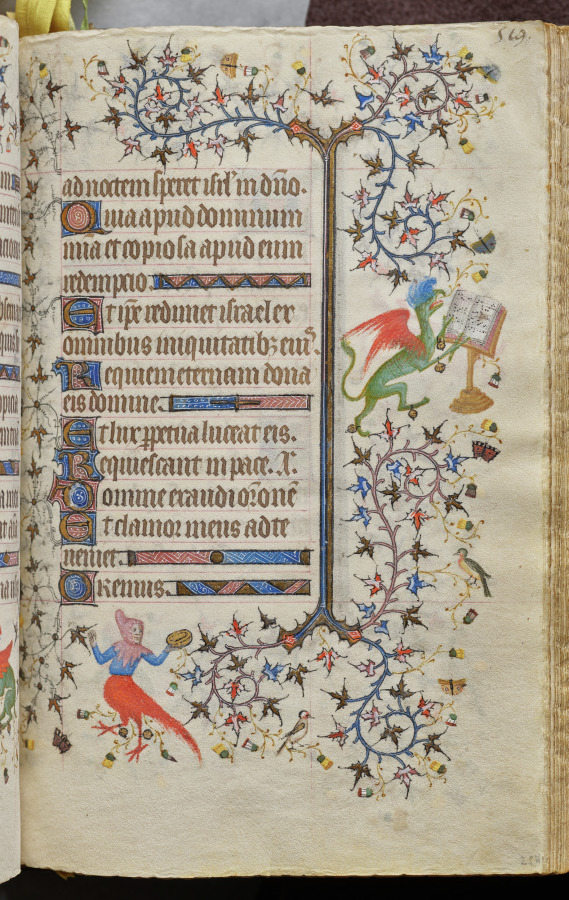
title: Hours of Charles the Noble, King of Navarre (1361-1425): fol. 254r, Text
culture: France, Paris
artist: Master of the Brussels Initials and Associates (French)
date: c. 1405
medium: ink, tempera, and gold on vellum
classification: Bound Volume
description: This precious volume was obviously highly prized by its owner, the French-born King of Navarre, who had his coat of arms painted on no less than twenty folios. Rather than directly commissioning this manuscript from a specific workshop, it seems that Charles the Noble acquired his book of hours -- perhaps ready-made for the luxury market -- while on a trip to Paris in 1404-05. A collaborative effort, six painting styles are evidenced within the pages of this codex, those of two Italians, two Frenchmen, and two Netherlanders. The painter who was responsible for the planning and decoration of the book, and who produced seventeen of the large miniatures, was a Bolognese artist known as the Master of the Brussels Initials. His principal assistant, responsible for most of the borders, was a Florentine who signed his name "Zecho" da Firenze on folio 208 verso.